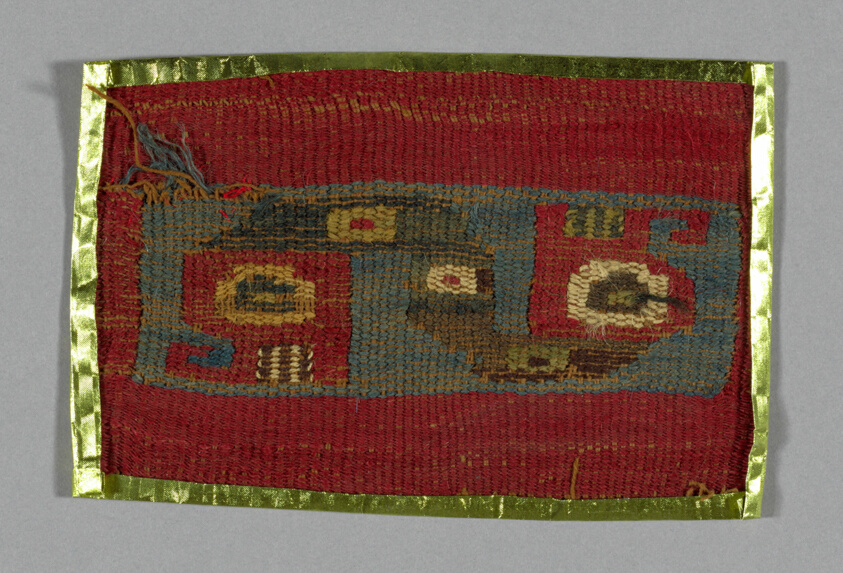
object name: Textile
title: Fragment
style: chimú, nazca, early intermediate period, Pre-Columbian, americas, andean, andes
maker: Possibly Chimú; Possibly north coast, Peru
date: A.D. 1250/1532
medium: Cotton and wool (camelid), bands of plain weave with supplementary brocading wefts and weave with paired warps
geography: Peru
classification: textile; weaving